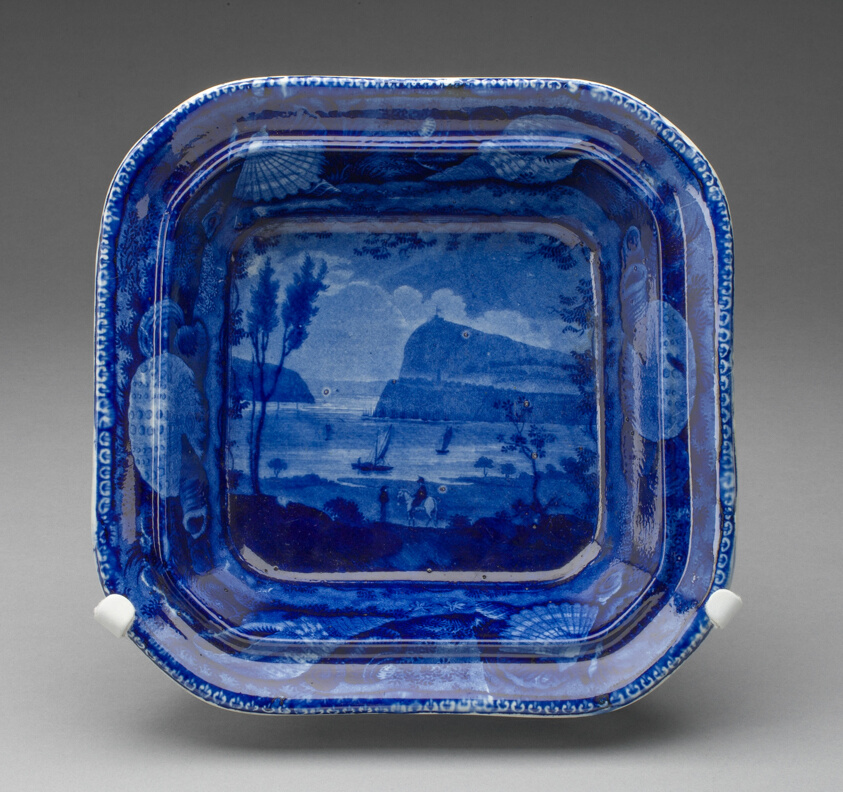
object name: Ceramics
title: Dish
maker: England, Staffordshire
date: Mid 19th century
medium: Earthenware with blue transfer-printed decoration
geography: Staffordshire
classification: dish (vessel); earthenware; european decorative arts; ceramics